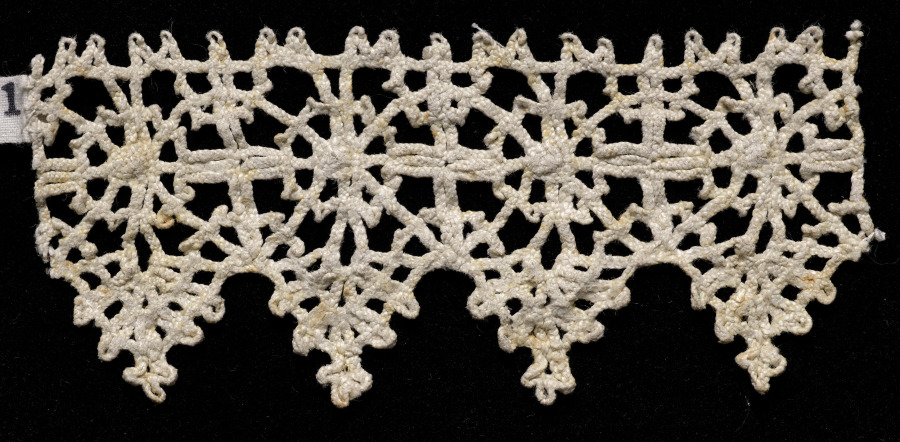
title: Lace Insertion and Points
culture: Italy, Venice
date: 1540–60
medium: Bobbin lace (needle lace, reticella design)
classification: Lace